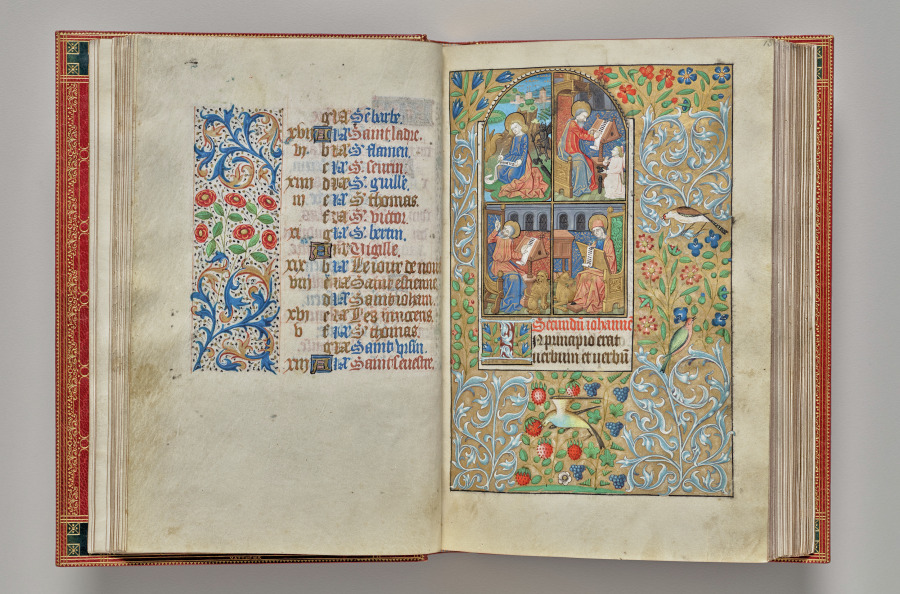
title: Book of Hours (Use of Rouen): fol. 13r, The Four Evangelists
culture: France, Rouen, 15th century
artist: Master of the Geneva Latini (French, active Rouen, 1460–80)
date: c. 1470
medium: ink, tempera, and gold on vellum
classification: Bound Volume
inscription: Secundm iohanne In principio erat Verbum et Verbu…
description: A regular feature in books of hours after the 1400s is gospel lessons. These texts come from the Bible and are what make a book of hours sacred. In lavish editions, images of the evangelists believed to have written the Gospels—Mathew, Mark, Luke, and John—introduce the texts. The gospel lessons describe God’s divine plan beginning with the Annunciation, or announcement to the Virgin Mary that she would conceive a son by the power of the Holy Spirit. They continue with the story of Christ’s birth and the visitation of the three magi, or kings. The lessons end with the resurrection of Christ after the Crucifixion and his ascension into heaven. At the time of use, households did not own Bibles, making the inclusion of these texts, which had once been solely the provision of the ordained, precious. The rubric, or red text, of the recto (right) page says Secundum Iohanne, or Gospel of John, indicating the gospel lessons’ beginning. The page is enhanced with an image of the four evangelists writing the Gospels. At top left is John, with an eagle, writing while the devil tries to thwart him by stealing his inkwell. Beside this is Matthew, at a traditional desk, an angel kneeling nearby. In the text row are Mark with a lion and Luke with an ox.